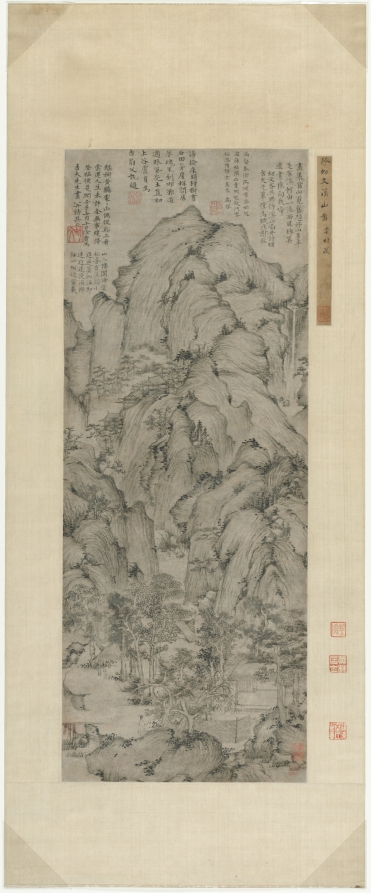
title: Streams and Mountains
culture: China, Yuan dynasty (1271-1368)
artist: Xu Ben (Chinese, 1335–1380)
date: 1372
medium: hanging scroll, ink on paper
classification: Painting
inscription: 綠樹黃鸝處處山， 偶從谿上看雲還。/ 人生未許全無事， 纔得登臨便是閑。 壬子七月十日徐賁為吉夫先生畫 並詩共上 [印] 幼文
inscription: Label on mounting probably by Liang Qingbiao 梁清標 (1620–1691).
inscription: 4 additional inscriptions and 9 additional seals: 1 poem of Xie Hui 謝徽 (c. 2nd half 14th c.); 1 poem and 1 seal of Gao Qi 高啟 (1336–1374); 1 poem and 1 seal of Lu Zhen 盧貞 (c. late 14th c.); 1 poem of Huang Zai 黃載; 3 seals of Liang Qingbiao 梁清標 (1620–1691); 1 seal of Wang Jiqian [C. C. Wang] 王季遷 (1907–2003); 3 seals unidentified.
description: Like many literati of the late Yuan and early Ming dynasties, Xu Ben was entangled with the perils of dynastic change as well as the ups and downs of his official career. It was mainly through the art of painting and poetry, as well as the ideal of reclusion, that he sought feelings of exhilaration and shared them with his friends. Xu created this monumental landscape during one of his periods of reclusion. His innumerable “hemp-fiber” texture strokes create a unifying rhythm among the towering mountains with tightly knit masses of rocks. Nestled among shady trees at the base of the mountain is a rustic retreat, which a scholar approaches on foot to visit with the hermit. Among the five inscriptions at the top of the painting is one by the artist himself. He dedicated the painting to someone named Jifu 吉夫 and recorded a poem in praise of mountains. Green trees, yellow orioles, everywhere are mountains; Aimlessly I return from the stream, where I watched the clouds. Man's life does not allow unbroken ease, But to be able to be high up in the mountain, this is leisure.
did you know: An attendant opens a reed gate to welcome the scholar with a walking stick approaching the rustic retreat.